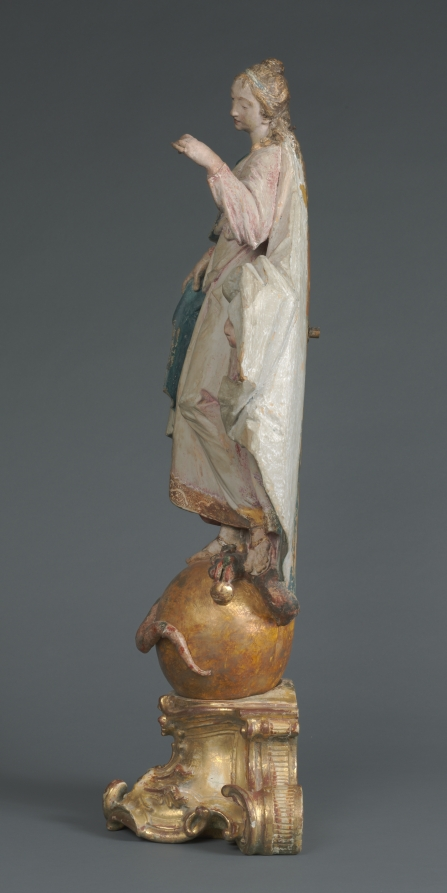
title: The Immaculate Conception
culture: Germany, Munich, 18th century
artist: Ignaz Günther (German, 1725–1775)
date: c. 1770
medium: painted and gilded wood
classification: Sculpture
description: The Christian doctrine of the Immaculate Conception maintains that the Virgin Mary was conceived free from sin, ready to be the pure vessel for Christ’s birth. Depicting such an abstract idea required specific imagery. The moon beneath the Virgin’s feet, for example, comes from the New Testament vision of Saint John the Evangelist (Revelation 12:1) of “a woman clothed with the sun, with the moon under her feet,” while the serpent upon which she treads symbolizes Christ’s triumph over original sin. With his characteristically delicate modeling, elongated proportions, and soft coloring, Ignaz Günther created an archetypal image of innocence on the cusp of womanhood.